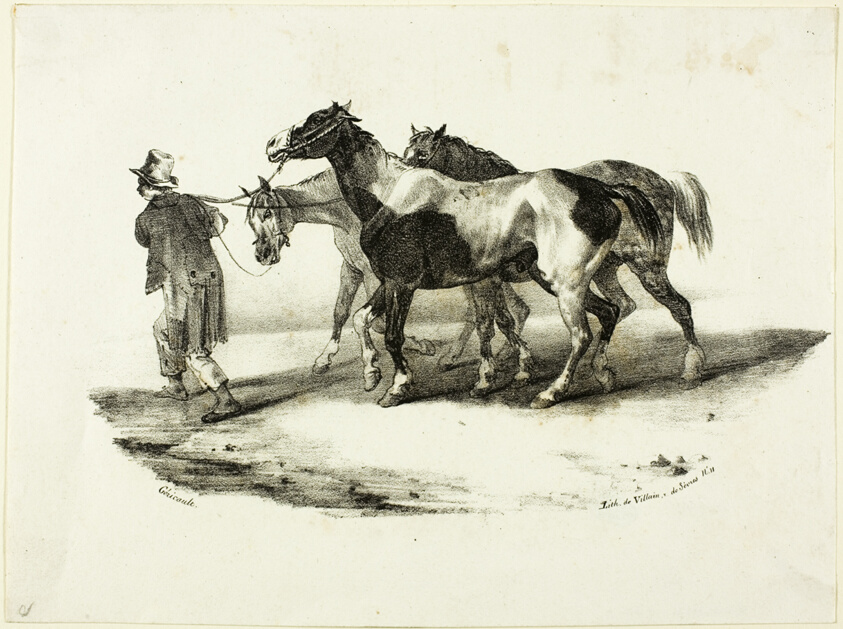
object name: Print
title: Horses Being Led to the Skinner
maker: Jean Louis André Théodore Géricault (French, 1791-1824); printed by François le Villain; published by Gihaut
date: 1823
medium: Lithograph in black on ivory wove paper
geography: France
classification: lithograph; print; prints and drawing